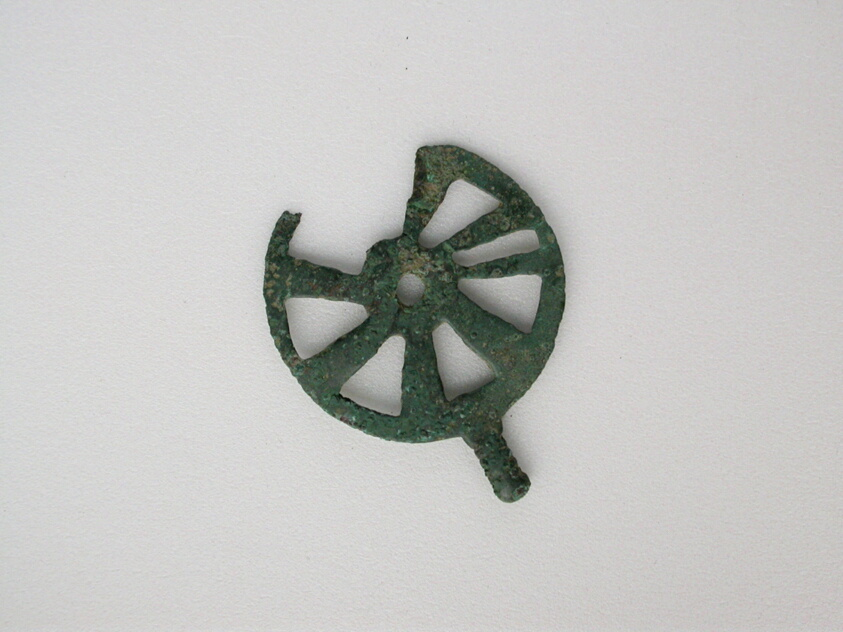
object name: Decorative Arts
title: Disc with Flange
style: geometric, ancient, greek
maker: Greek; Thessaly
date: Geometric Period (800–600 BCE)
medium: Bronze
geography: Thessalía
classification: votive offering; ex-voto; decorative arts